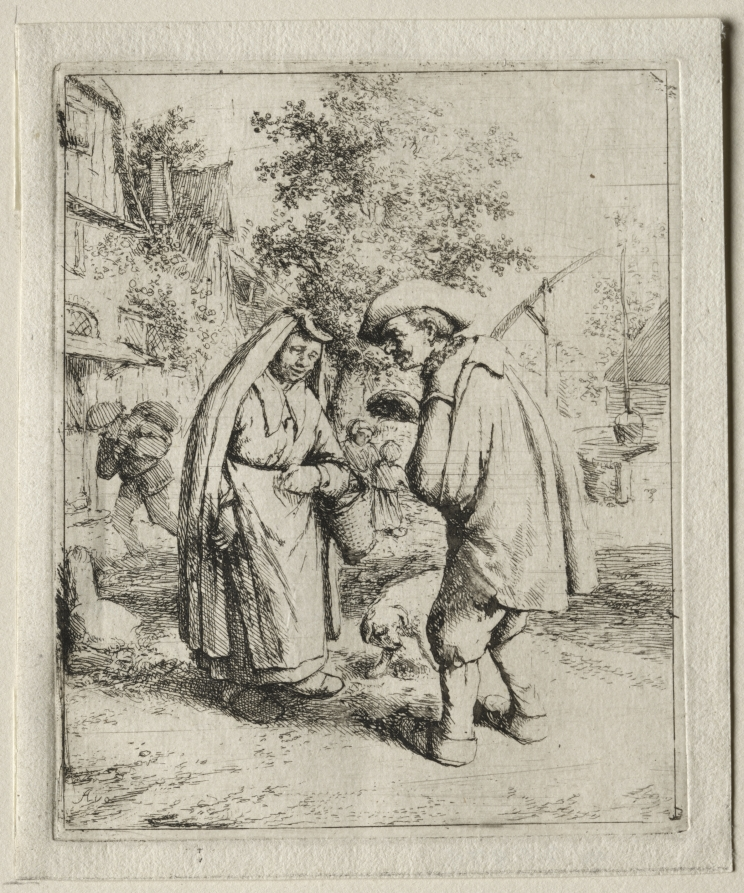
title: Man Conversing with a Woman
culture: Netherlands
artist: Adriaen van Ostade (Dutch, 1610–1684)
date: c. 1648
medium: etching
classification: Print